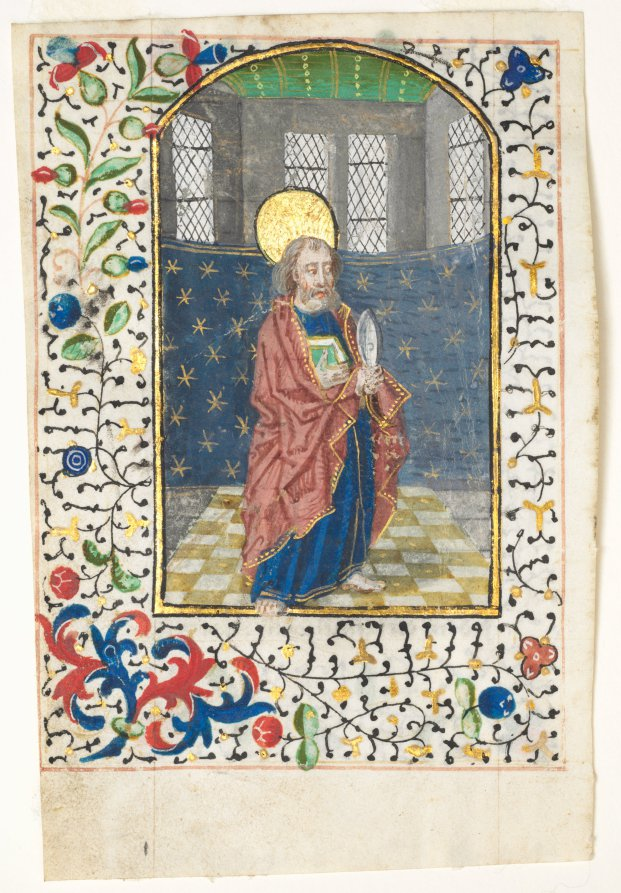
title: Leaf from a Book of Hours: St. Bartholomew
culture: Flanders, Bruges (?), 15th century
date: c. 1440–1460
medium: ink, tempera and gold on vellum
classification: Manuscript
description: Little is known of the life or acts of Saint Bartholomew, one of the twelve apostles. The Golden Legend records the tradition that Bartholomew preached in India and Armenia after Christ’s resurrection. It was in Armenia that the saint was martyred by being flayed alive. His attribute in art, as shown here, is typically a knife, the instrument of his death. The saint is shown standing within an architectural interior with a paneled ceiling, leaded windows, tiled floor, and a hanging cloth embellished with stars. The artist has not yet been identified, though his slightly expressionistic style and jagged, irregular drapery folds, as well as the border decoration, are typical of Flemish manuscript painting around the mid-1400s.